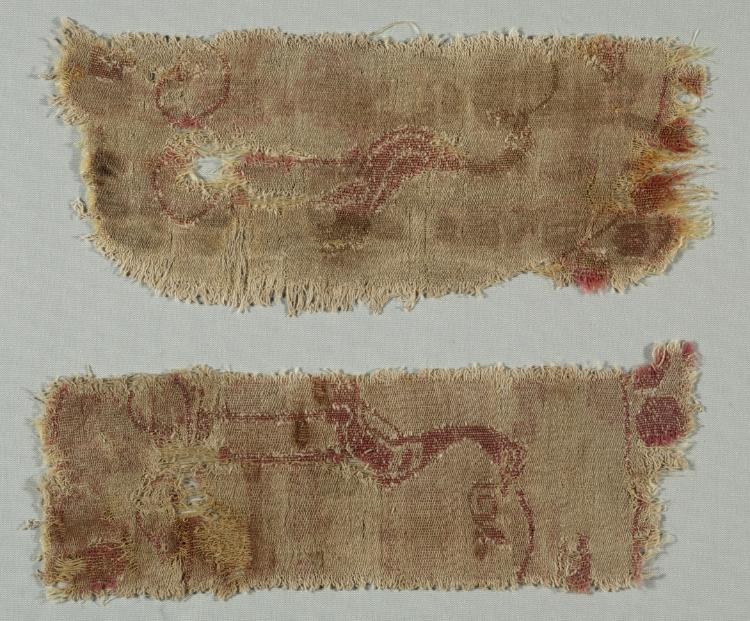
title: Two Fragments of Large Scale Roundel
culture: Iran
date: 600s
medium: compound twill; wool and cotton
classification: Textile